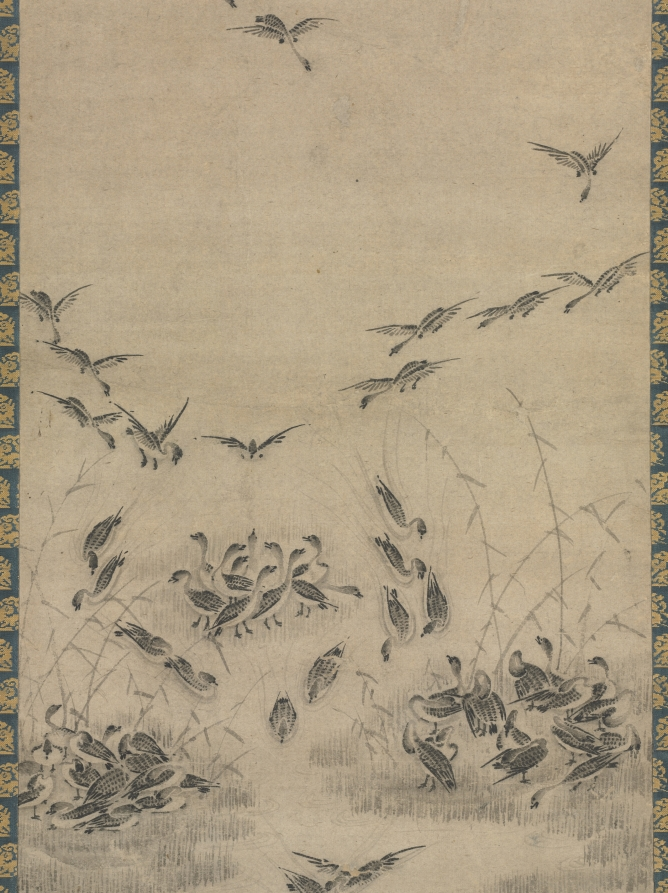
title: Geese Returning Home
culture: Korea, Joseon dynasty (1392–1910)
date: 1600s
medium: hanging scroll; ink on paper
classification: Painting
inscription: three seals in upper right; one in upper left corner.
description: In this hanging scroll, wild geese are portrayed engaging in different activities: descending to a marsh, gathering in flocks, grazing on plants, and dipping their heads under the water. In Korean paintings, images of geese serve as the symbol of seasonal change because they migrate from northern areas such as Siberia to stay in the Korean Peninsula during the late fall and winter.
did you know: In Korea, the word for geese in a grove of reeds, noan, has the same pronunciation as the word for "the comfortable life at old age." With this double meaning for a happy life, the motif of returning geese gained popularity in paintings.